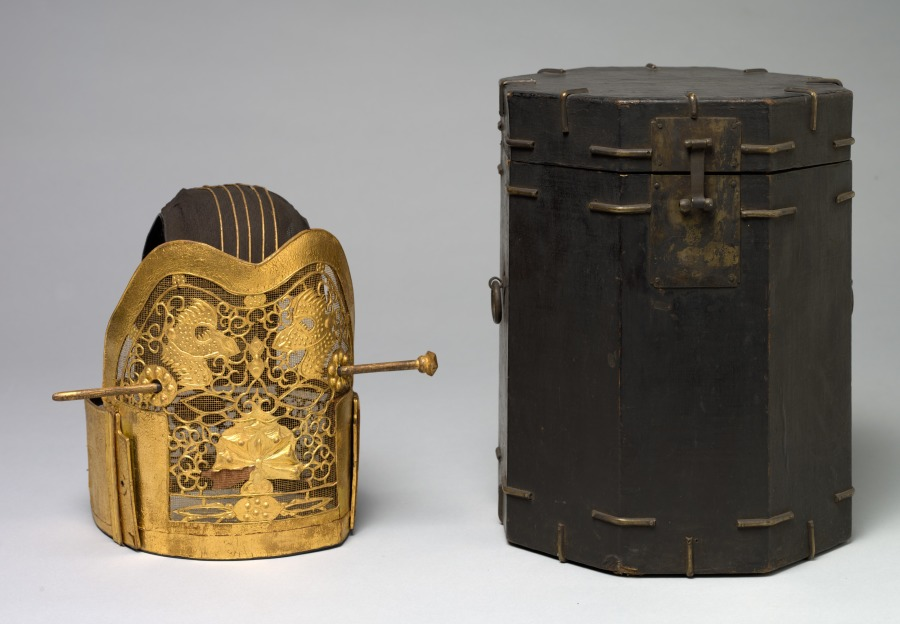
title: Crown for the Royal Ceremonial Costume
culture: Korea, Joseon dynasty (1392–1910)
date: late 1800s–early 1900s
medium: gilded paper, metal wire, and black silk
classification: Garment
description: This is a set of royal ceremonial robe and accessories worn by a high-ranking court official for attending special state ceremonies. The set consists of an inner coat, an outer coat, a skirt, a back apron, a crown, a pair of jade tassels, a tablet, and a belt.